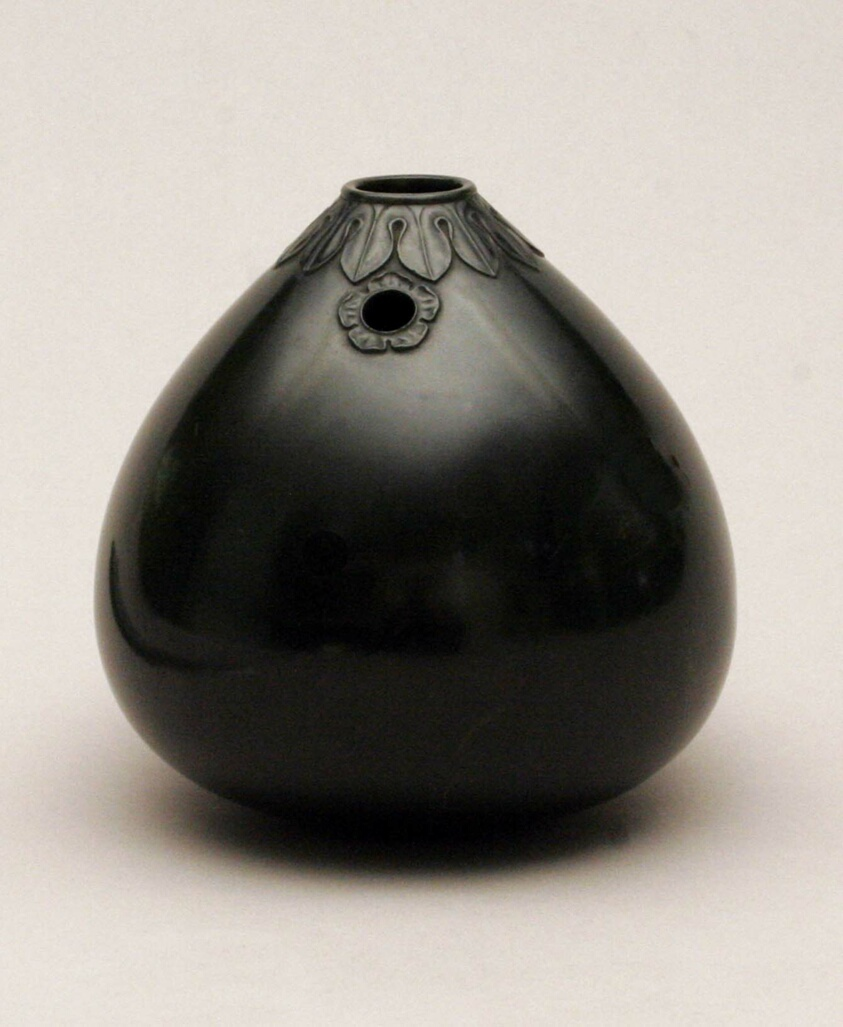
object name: Vessel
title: Vase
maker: China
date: Qing dynasty (1644-1911), 18th century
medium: Dark green jade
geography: China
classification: jade; asian art; vessel